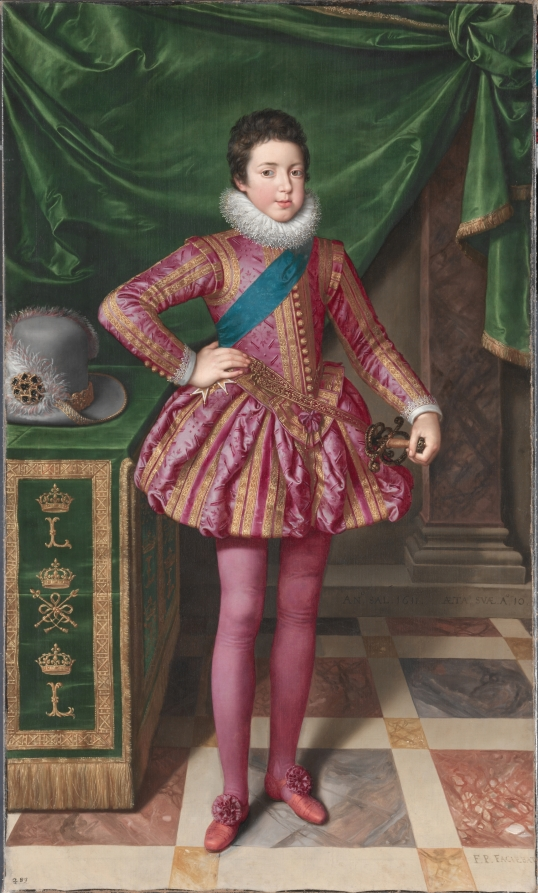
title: Portrait of King Louis XIII of France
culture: Flanders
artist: Frans Pourbus (Flemish, 1569–1622)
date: 1611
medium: oil on canvas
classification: Painting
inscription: Signed with the monogram lower right: F.P. FACIEBAT. Inscribed middle right: AN° SAL. 1611. AETA'. SVAE. A°. 10. Inscribed with inventory number lower left 783. Inscribed on the reverse, on a hand written label: brought back from Rome by J. W. Brigstocke of Carmarthen.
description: Although ten-year-old Louis XIII was king of France, his mother Marie de’ Medici remained in power until the boy officially came of age. Pourbus inscribed the sitter’s age and the painting’s year in the composition: “The holy year 1611 at his age of 10 years.” Marie de’ Medici commissioned this work as she negotiated marriages for her two children to Philip III of Spain and Mary Marguerite of Austria, alliances that led to the European domination of the next two centuries by the Bourbon and Habsburg families.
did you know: While the color pink has feminine associations now, it was commonly worn by girls and boys alike in the 1600s.